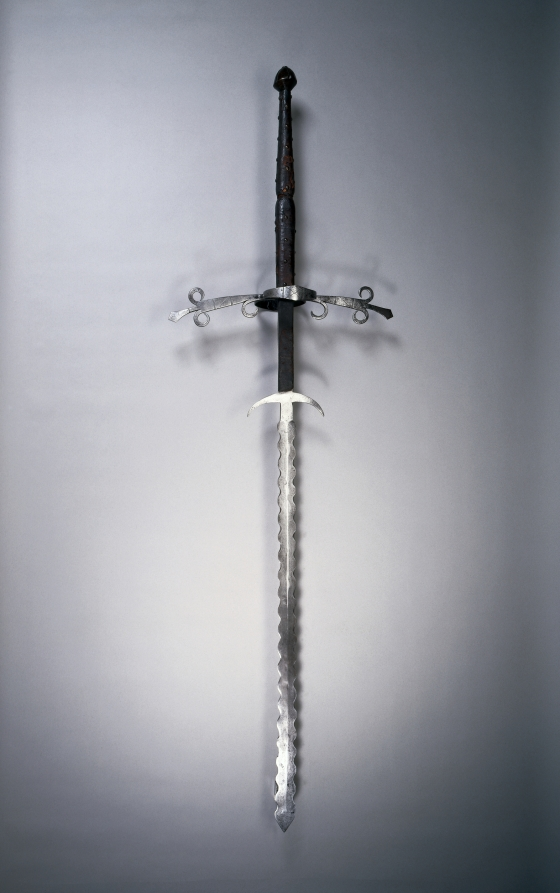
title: Two-Handed Sword with Flamboyant Blade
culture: Germany, second half 16th Century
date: 1550–1600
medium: steel, leather and wood grip with brass rivets; bronze pommel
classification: Arms and Armor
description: The two-handed sword, originally a weapon of war for specialist infantry, is so named because two hands were required to wield it. By the late 1600s, these enormous swords assumed a largely ceremonial or bodyguard function.